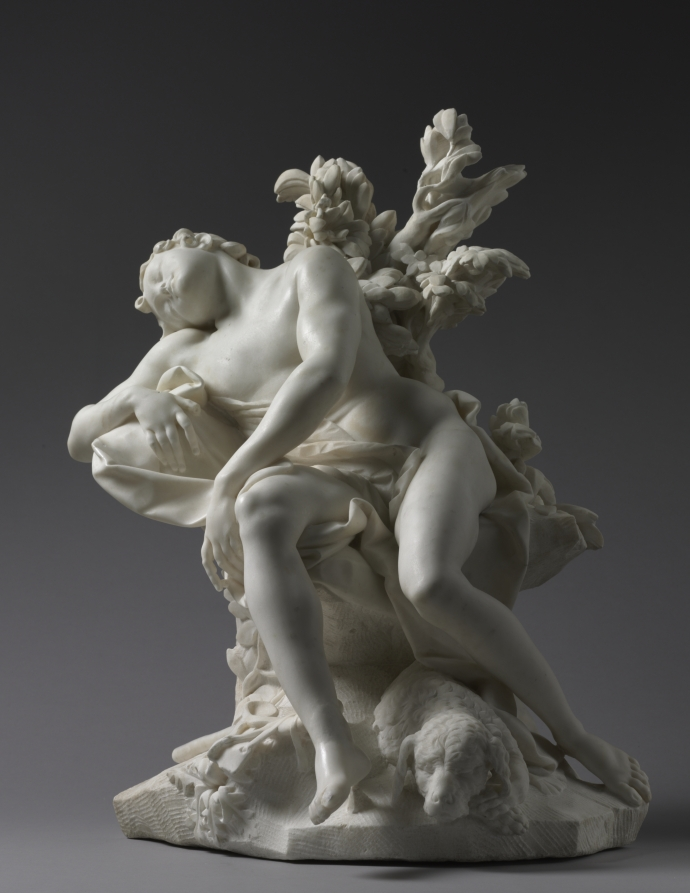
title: Sleeping Endymion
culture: Italy, 18th century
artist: Agostino Cornacchini (Italian, 1686–1754)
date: 1716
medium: marble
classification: Sculpture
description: Cornacchini moved away from the dramatic movement and light effects characteristic of baroque sculpture toward a calmer, gentler, more graceful style favored by 18th-century taste. This sculpture depicts Endymion, a beautiful young shepherd from Greek mythology. His beauty so entranced Selene, the personification of the moon, that she asked Zeus to grant Endymion immortality. Zeus did so, but only after placing Endymion in an eternal sleep.